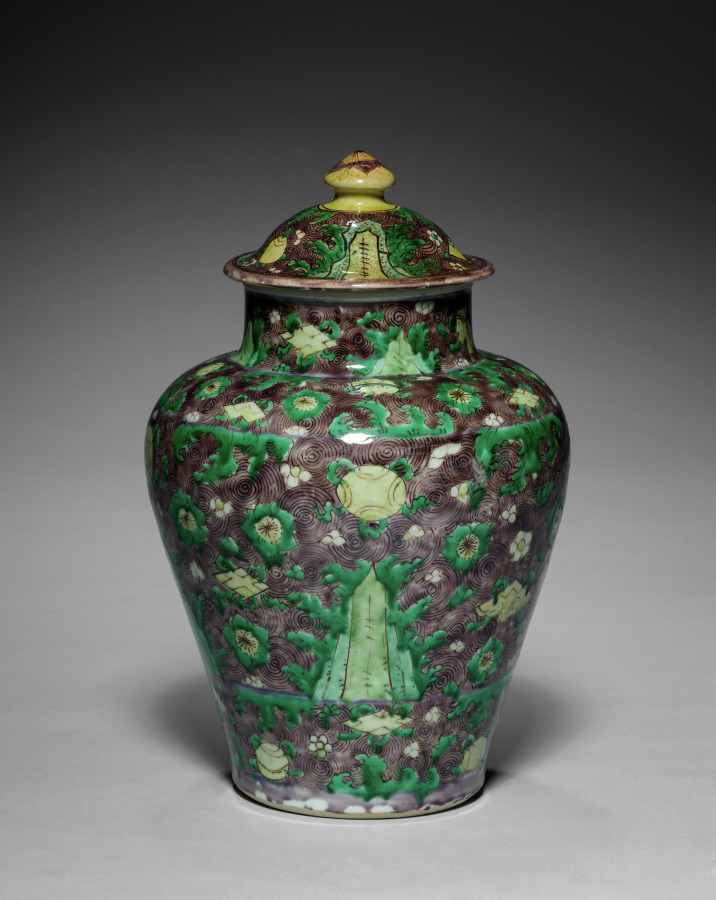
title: Baluster Jar and Cover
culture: China, Jiangxi province, Jingdezhen kilns, Ming dynasty (1368–1644) or Qing dynasty (1644–1911)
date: 1600–1650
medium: Porcelain with wucai (five-color) enamels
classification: Ceramic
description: The central motif on this jar is a mountain emerging from the sea, symbolizing Mount Sumeru in Buddhist cosmology, and representing the central axis in the universe in Daoism. White cherry blossoms floating on the wavy ground are surrounded by auspicious symbols such as the coin for wealth and the lozenge for victory. The yellow knob on the jar’s cover depicts a cherry blossom. Other fortuitous motifs—such as the leaf of protection, the pearl to grant wishes, the stone chime for celebration, rocks symbolizing longevity—also decorate the lid. While most jars have lost their covers over time, this jar retains its original lid.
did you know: The waves are depicted in a rich aubergine, or purple, glaze.